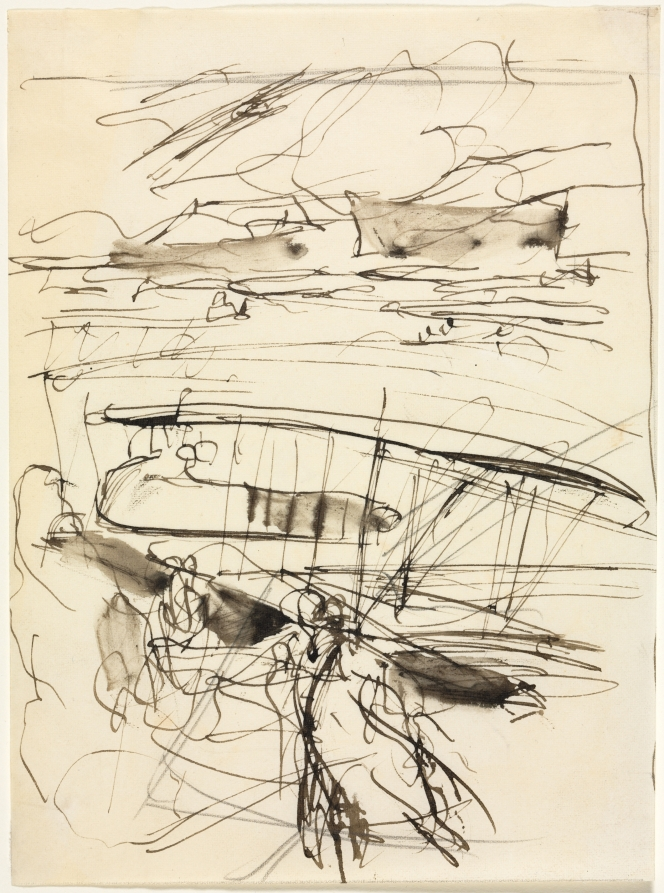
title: Avions reposant sur le terrain (verso)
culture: France, 20th century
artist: Auguste Louis Lepère (French, 1849–1918)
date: 1914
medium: brush and brown ink and wash over pencil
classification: Drawing